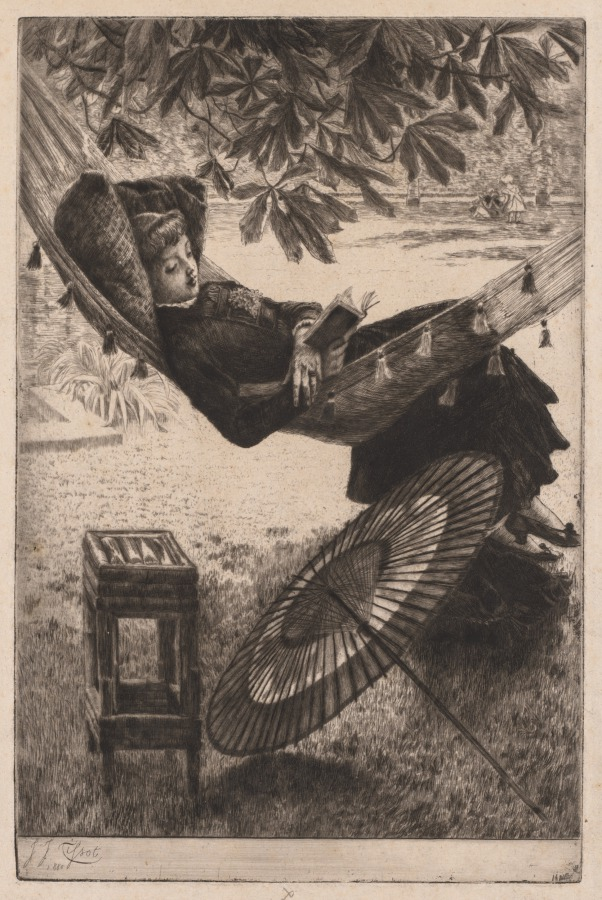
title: The Hammock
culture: France, 19th century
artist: James Tissot (French, 1836–1902)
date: 1880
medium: etching and drypoint on antique laid paper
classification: Print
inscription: In plate at lower left: “J.J. Tissot / 1880”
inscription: In graphite at lower center on recto: “Bon a Tirer / J Tissot”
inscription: Stamped in red at lower left on recto: “JCC” (not in Lugt)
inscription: Stamped in black at lower right on verso: “H.M.P.” (L. 5031)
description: This etching depicts Kathleen Newton, a British divorcee who frequently modeled for the French artist James Tissot during the 1870s, while he lived in London. Based on a painting of the previous year, the print shows Newton reclining on a tasseled hammock in the artist’s own garden, engrossed in a novel. Tissot reinterpreted many of his paintings as etchings, inspired by a revived interest in the medium.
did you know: The inscription on this print, in Tissot’s handwriting, indicated that work on his printing plate was complete.